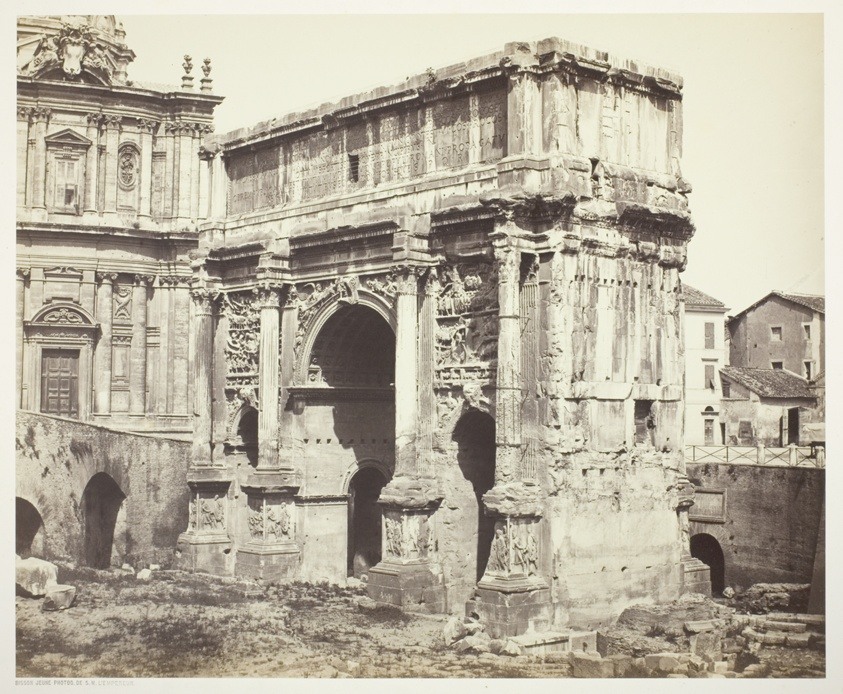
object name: Photograph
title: Arc de Septime Sévère, Rome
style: 19th century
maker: Bisson Frères (Louis-Auguste Bisson, French, 1814–1876 and; Auguste-Rosalie Bisson, French, 1826–1900)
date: 1854/55, printed 1855/65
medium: Albumen print, from the album "Reproductions photographiques des plus beaux types d’architecture et de sculpture"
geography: France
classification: albumen silver print; photographic process; photography; photograph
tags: Collected by Hugh Edwards, architecture